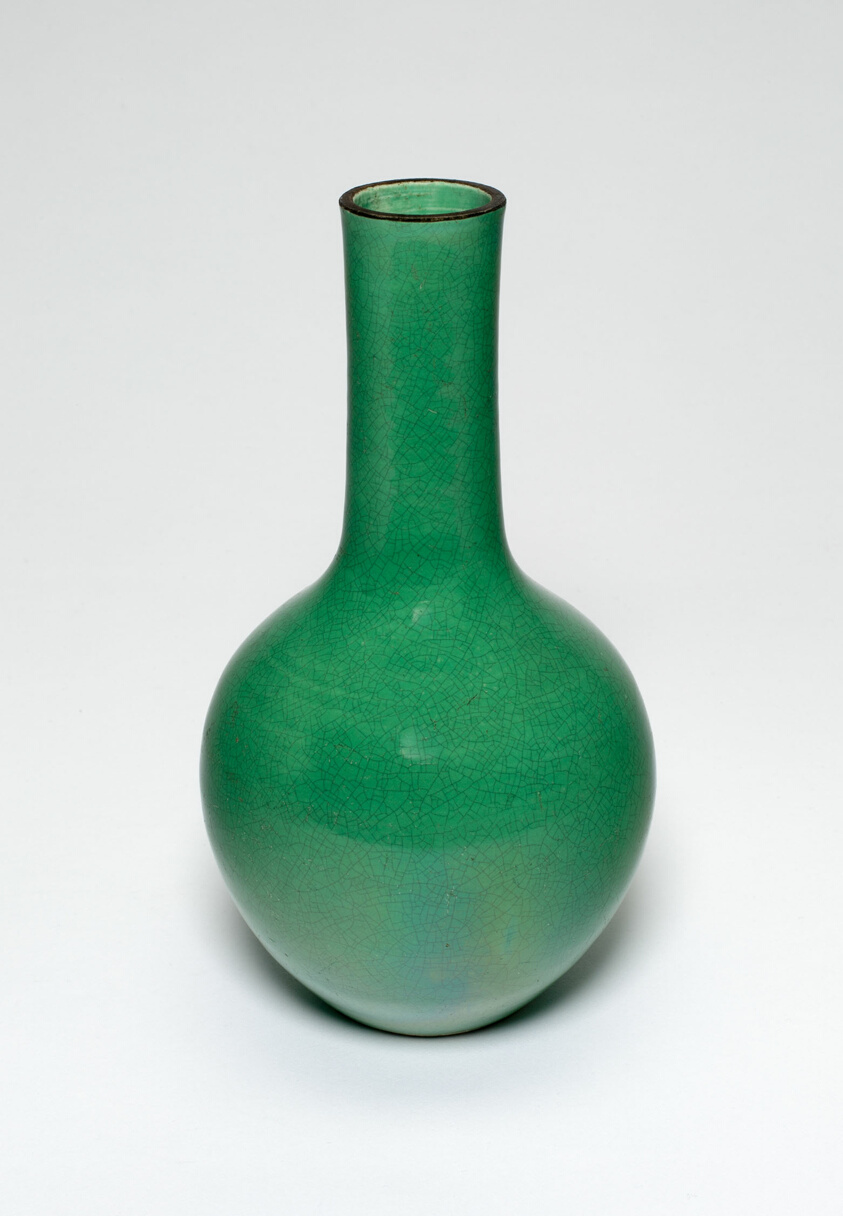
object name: Vessel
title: Bottle-Shaped Vase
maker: China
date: Qing dynasty (1644–1911), early 19th century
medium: Porcelain with green glaze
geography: China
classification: porcelain; asian art; ceramics